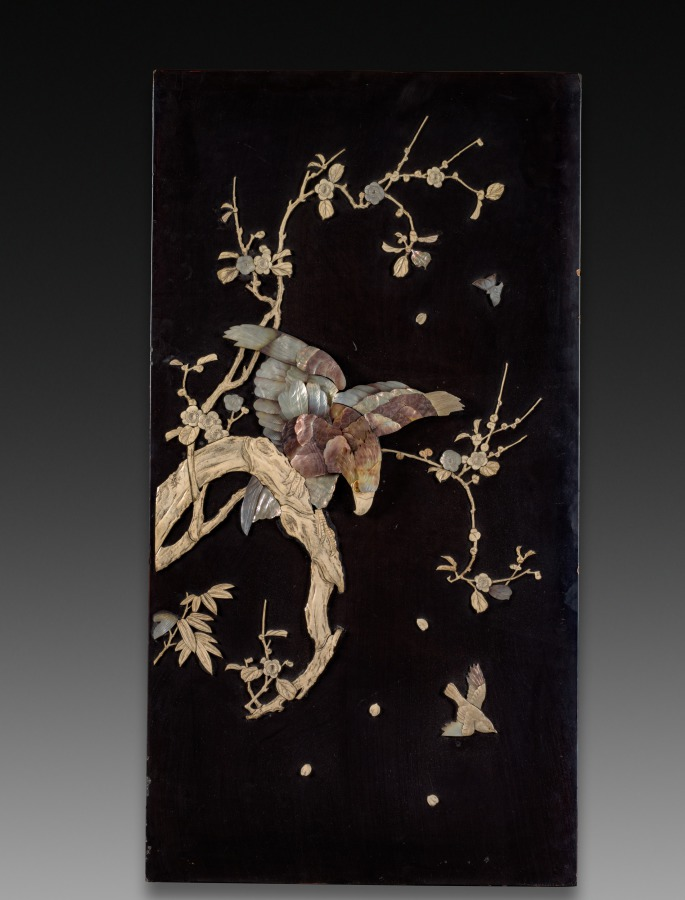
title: Decorative Panel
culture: Japan, Edo period (1615–1868) to Meiji period (1868–1912)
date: 1800s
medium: lacquer with ivory inlays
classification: Lacquer